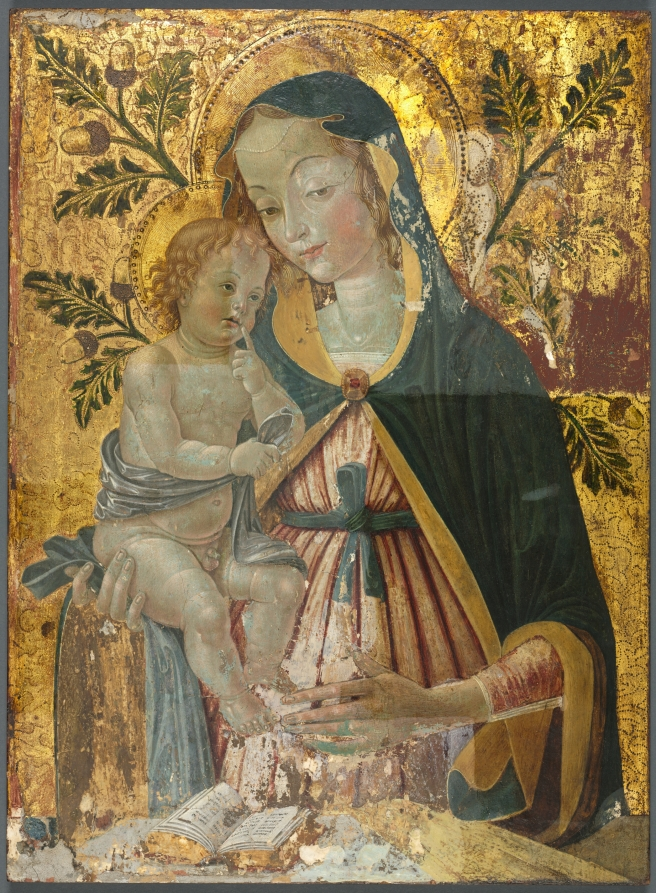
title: Virgin and Child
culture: Italy, Umbria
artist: circle of Fiorenzo di Lorenzo (Italian)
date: c. 1500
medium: tempera and gold on wood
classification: Painting